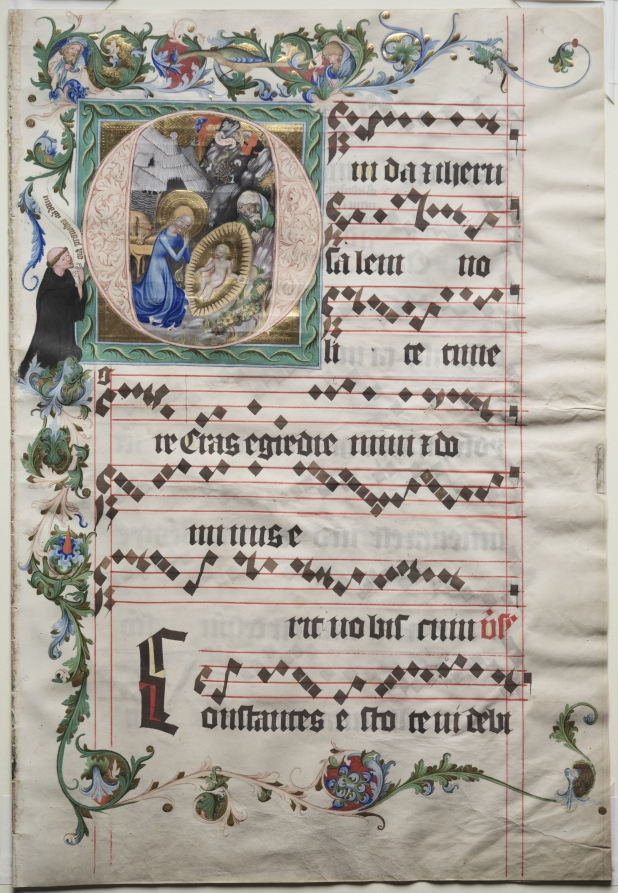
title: Bifolio from an Antiphonary: Historiated Initial O with the Nativity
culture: Bohemia, Prague, 15th century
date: early 1400s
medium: ink, tempera, and gold on parchment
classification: Manuscript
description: This splendid bifolium (a sheet folded in half to form two leaves) once formed part of an important antiphonary produced for an unidentified Benedictine monastery in Bohemia. With its rich illumination, it provides an important example of Bohemian painting during the opening years of the 15th century as well as painting in the city of Prague, one of the great court centers of Europe. The decoration of the leaf is dominated by a majestic initial O that depicts the Nativity. A scene in the background shows the angel Gabriel’s Annunciation to the Shepherds. The initial itself is placed within a square frame outside of which a single Benedictine monk observes the sacred event. The initial introduces the Latin chants for the first vespers of Christmas Day: O iuda et iherusalem (“Oh Judea and Jerusalem”). Framing the text are luxurious, scrolling acanthus leaves. Within the upper margin, two prophets emerge from the lush, foliated tendrils to observe the nativity below. In this way, the foretelling of the birth of Christ in the Old Testament is established visually.